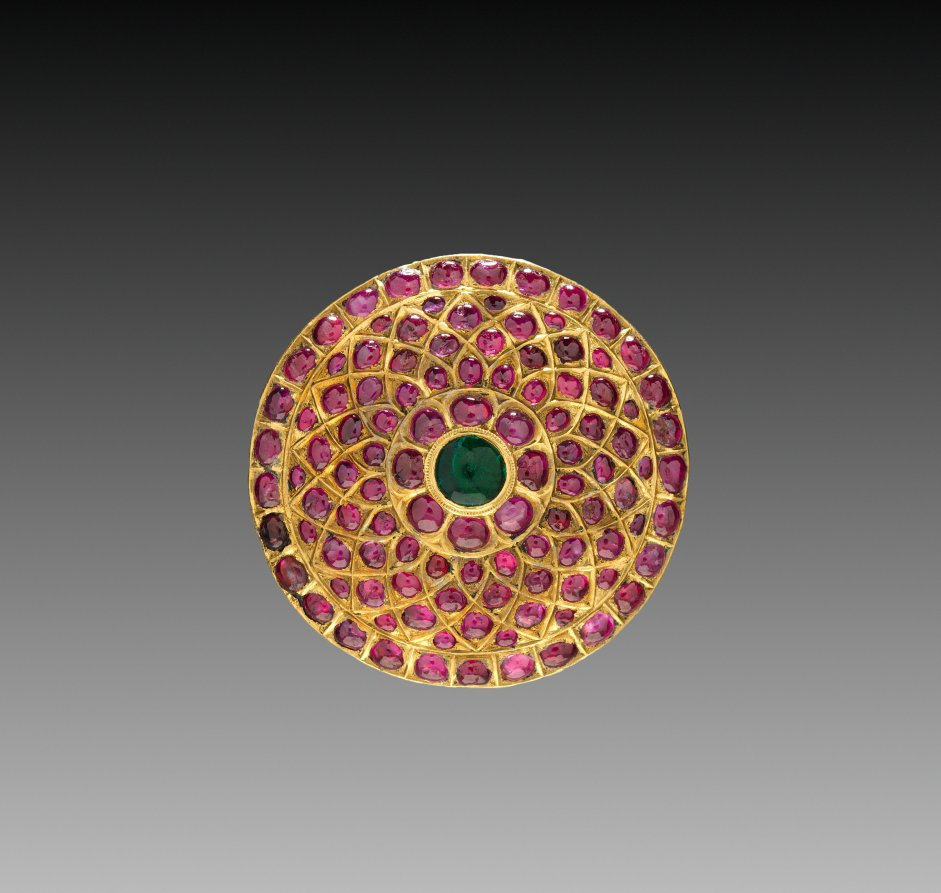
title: Hair Ornament, Jada Billi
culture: India, Jaipur, 17th century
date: 1600s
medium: gold, emerald and rubies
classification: Jewelry